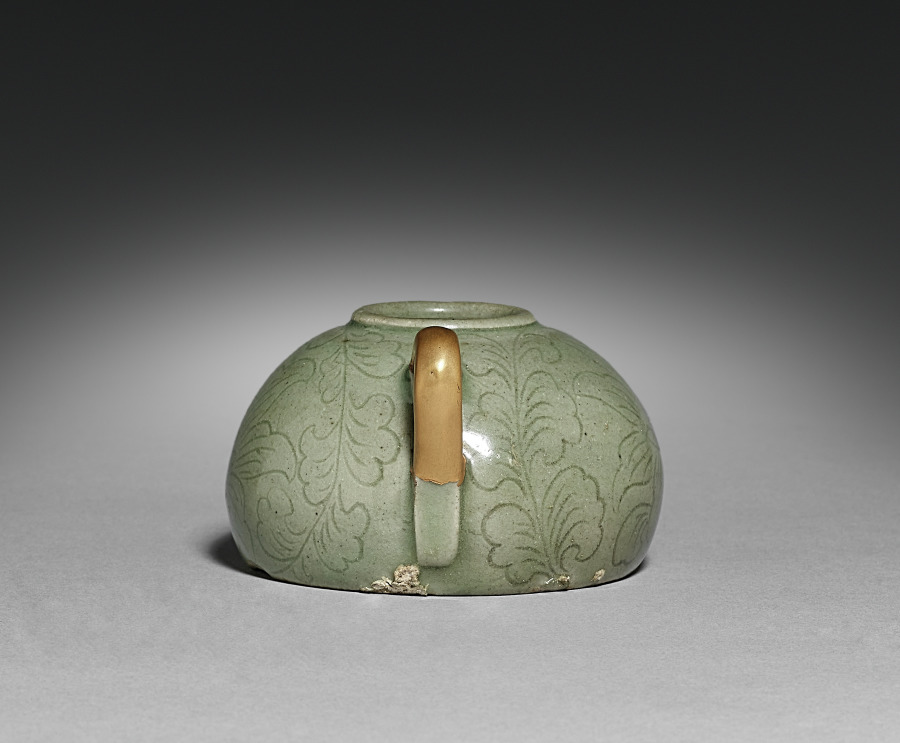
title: Wine Ewer with Incised Scroll Design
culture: Korea, Goryeo dynasty (918–1392)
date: 1100s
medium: celadon with incised and carved design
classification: Ceramic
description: Many celadon ceramics, such as these two miniature pots, have been repaired with gold lacquer. Termed kintsugi (literally meaning “gold joinery”) in Japanese, this restoration method highlights broken parts with glittering gold mixed with lacquer. Initiated in 15th-century Japan, the technique follows a popular aesthetic concept called wabi-sabi, which finds beauty in imperfect things. Goryeo celadons were considered rare treasures among early 20th-century Japanese collectors; thus, their broken condition is brilliantly highlighted in gold lacquer, as seen here in the repaired spouts, handle, and lid.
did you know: Termed kintsugi (literally meaning “gold joinery”) in Japanese, this method of repairing broken parts with glittering gold mixed with lacquer was extensively used for ceramic works in the Goryeo period, such as this one.